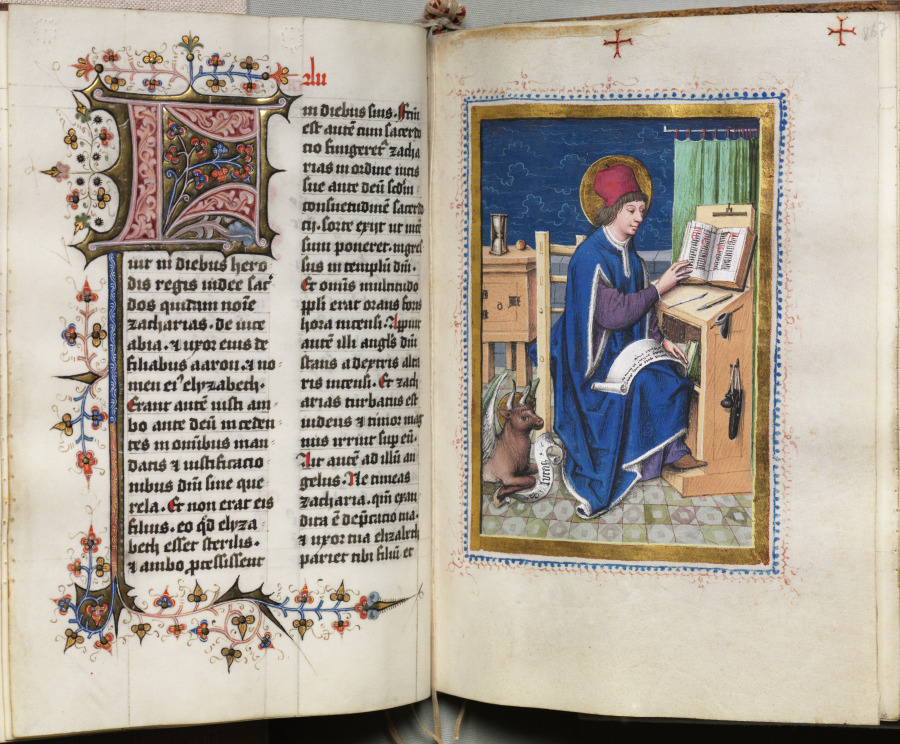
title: Gospel Book with Evangelist Portraits: Decorated Initial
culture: Germany, Middle Rhine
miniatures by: Master of the House-Book (German, c. 1470–1500)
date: c. 1480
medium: ink, tempera, and gold on vellum; original blind stamped leather binding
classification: Bound Volume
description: The four gospels are preceded by a full-page portrait miniature of the appropriate evangelist. Per tradition, they are represented as contemporary scribes surrounded by all the tools of their trade— ink pots, quill pens, and penknives. The anonymous illuminator of these miniatures, called the Hausbuch Master, is known primarily for an album of lively drawings as well as some 90 copper engravings now in Amsterdam. He was also apparently a panel painter of some distinction. The skillful pen work, tracery, and vine scrolls, as well as the large initials, are the work of other artists.The binding is original.